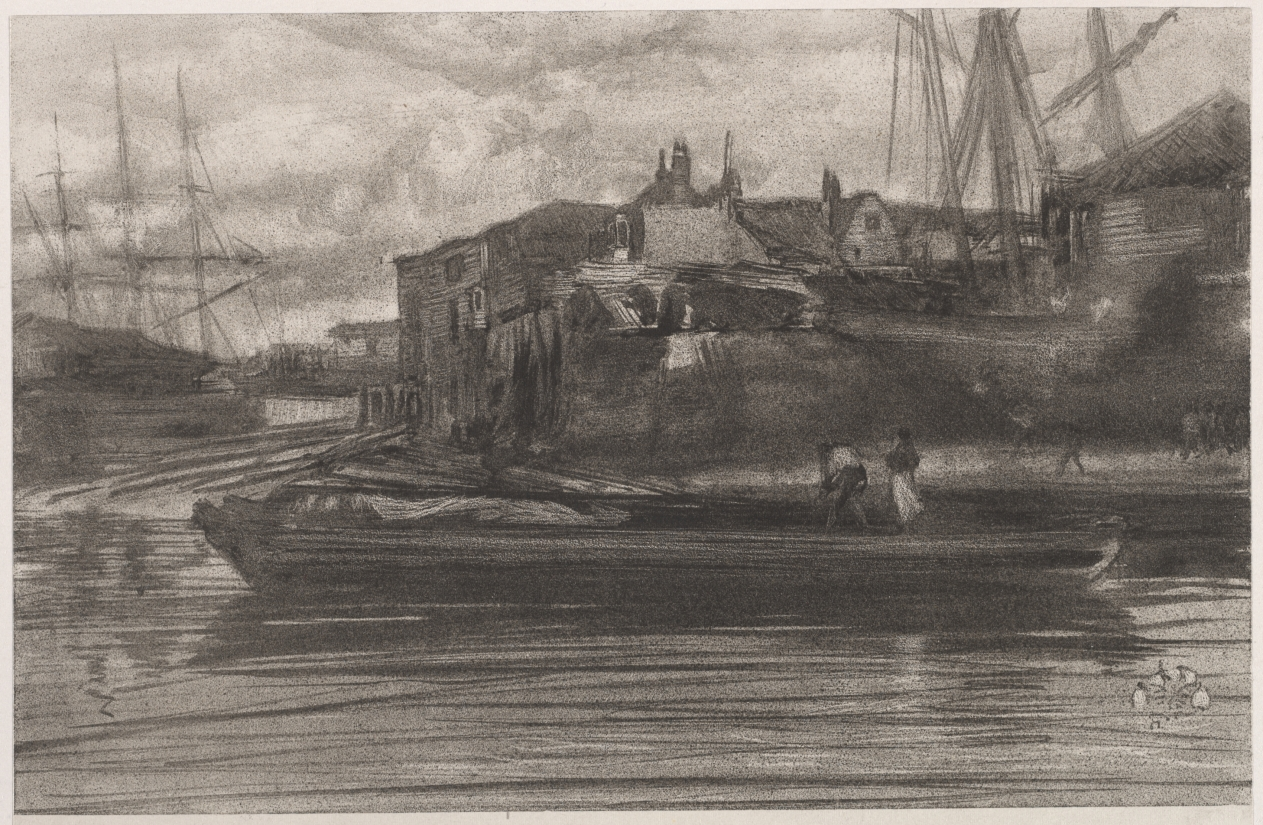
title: Limehouse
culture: America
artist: James McNeill Whistler (American, 1834–1903)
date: 1878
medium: lithograph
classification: Print